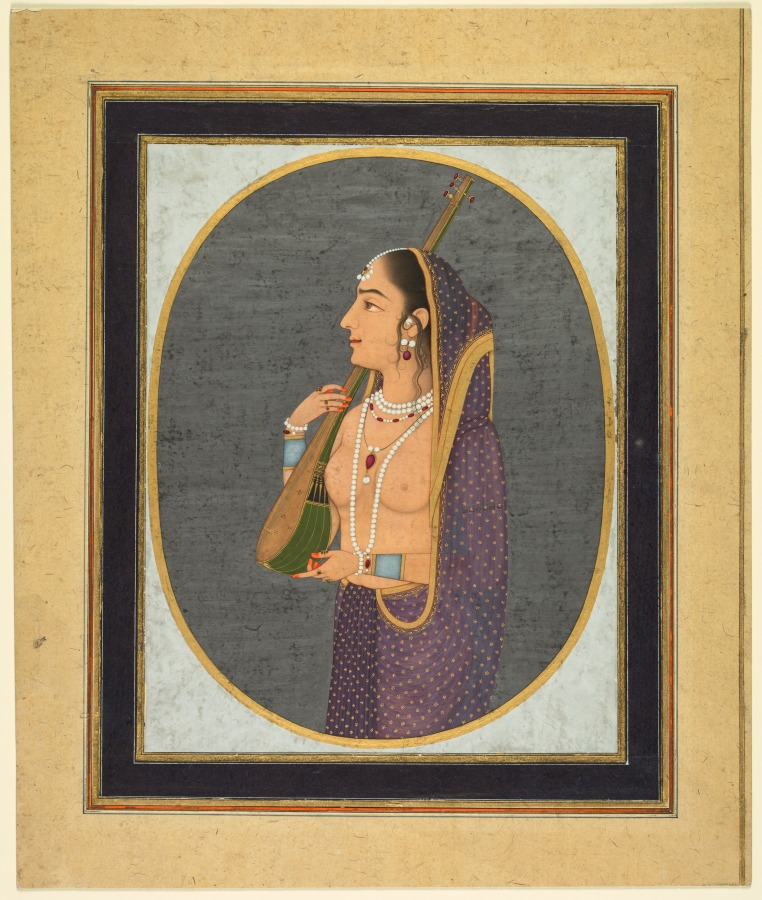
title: Court lady singing and playing the vina (recto)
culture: India, Lucknow, Mughal, 18th century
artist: attributed to Muhammad Rizavi Hindi (Indian, active mid-1700s)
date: c. 1760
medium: Gum tempera, ink, and gold on paper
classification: Painting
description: Her mouth open slightly in song, the woman’s hennaed fingers strum a three-string vina, an Indian musical instrument with a resonator made from a gourd. Music was an essential component of courtly entertainment, along with the drinking of wine and the appreciation of poetry, paintings, and jewels.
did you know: When the mouth is open, and teeth and tongue are showing, she is singing.